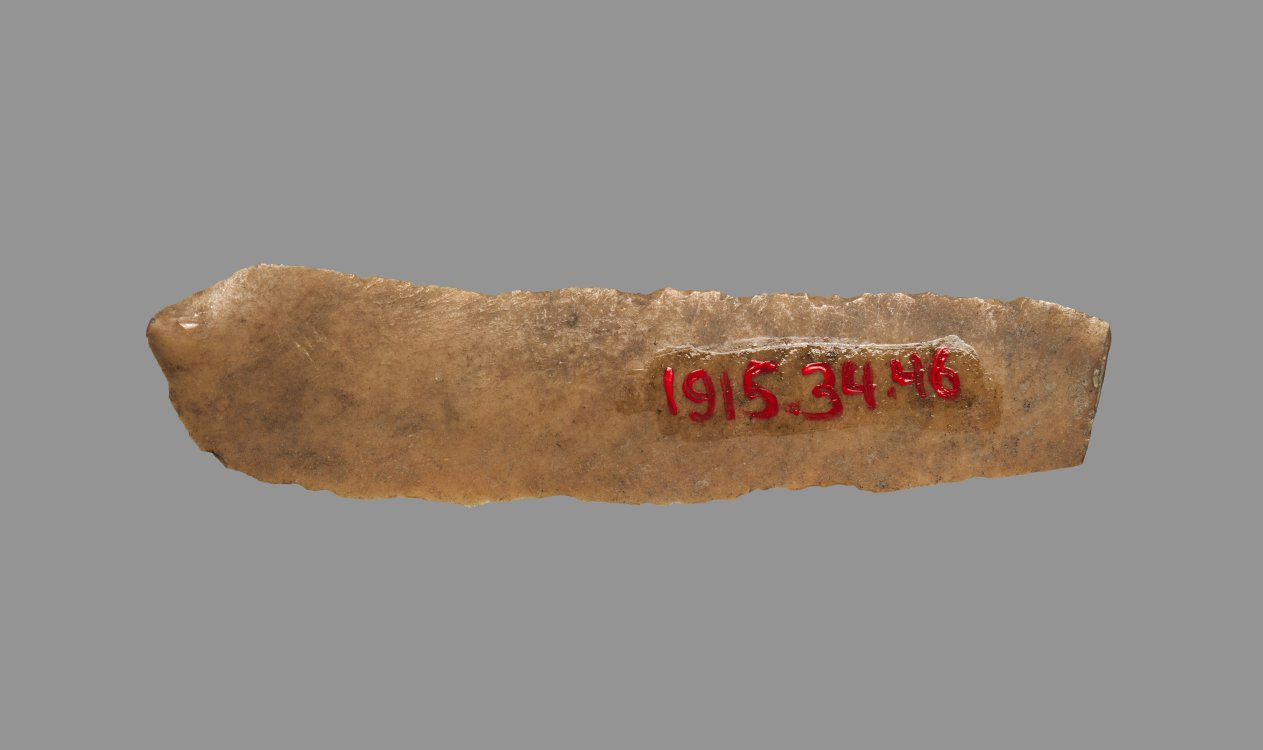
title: Sickle Blade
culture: Egypt, Middle Kingdom (2040–1648 BCE), Dynasty 12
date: 1980–1801 BCE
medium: flint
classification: Implements